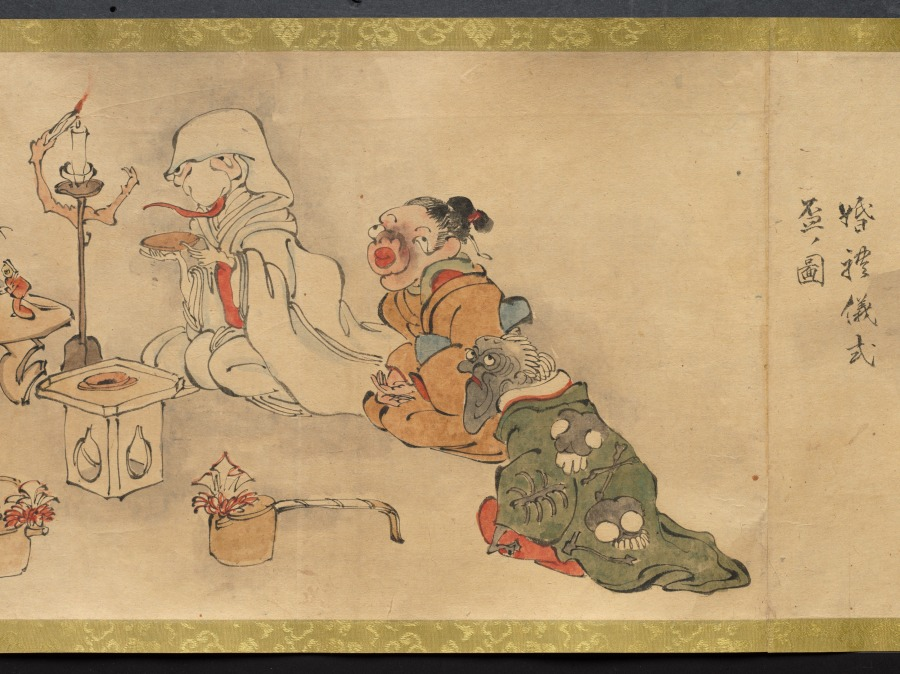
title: An Illustrated Marriage of Apparitions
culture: Japan, Edo period (1615–1868)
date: mid-1800s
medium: handscroll; ink and color on paper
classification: Painting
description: The matchmaking, engagement, wedding, and birth of the first child of two apparitions, or bakemono, literally "things that change," are illustrated in this whimsical, humorous handscroll. Japanese folklore abounds with such strange creatures, most famously represented in handscrolls featuring a procession of 100 supernatural monsters. Aside from a textual preface and cartouches indicating the content of the scenes, the tale is told visually. The artist and whereabouts of the original handscroll are unknown, but a number of other 19th-century copies by amateur painters exist in Japanese collections, attesting to its broad appeal.